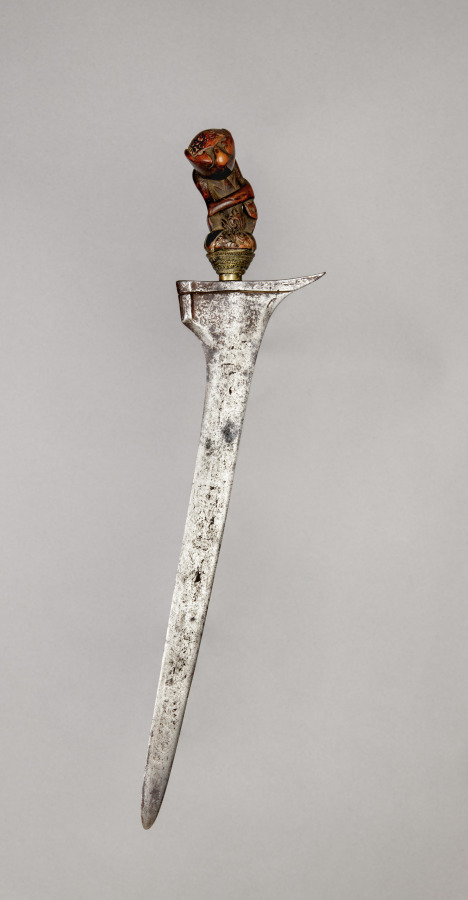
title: Sword (Kris)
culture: Java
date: 1800s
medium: iron with carved wooden handle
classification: Arms and Armor